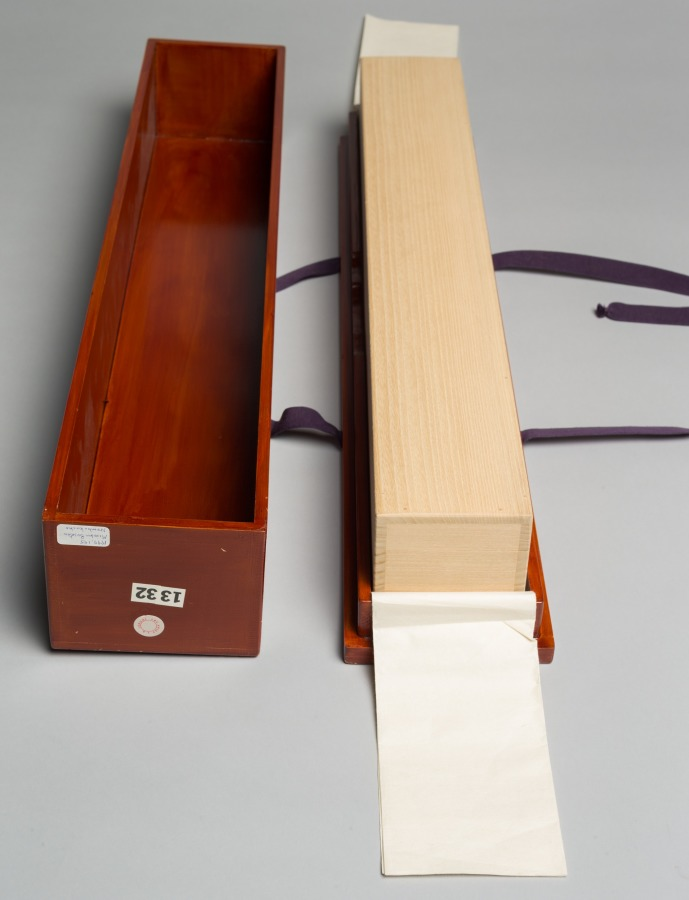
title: Miroku (Maitreya)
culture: Japan, Nanbokuchō period (1336–92)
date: 1300s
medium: Hanging scroll, ink, color, gold, and cut gold on silk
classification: Painting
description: In this image the figure of Miroku, Maitreya in Sanskrit, is richly adorned with gauzy fabrics, opulent jewels, and an intricate gold crown containing five seated Buddhas. Buddhist teachings say that Miroku will descend to Earth as a Buddha to restore Buddhist doctrine at the end of a long period of decline. Here he is represented as a bodhisattva, a being who has attained enlightenment but has chosen to postpone becoming a Buddha to help others reach enlightenment. Above the painting, three inscriptions present portions of a sacred text related to Miroku. A close look at the bodhisattva’s right side where fragile pigments have fallen away reveals writing on the back of the silk on which the image is painted— something its mounters never expected to be seen.